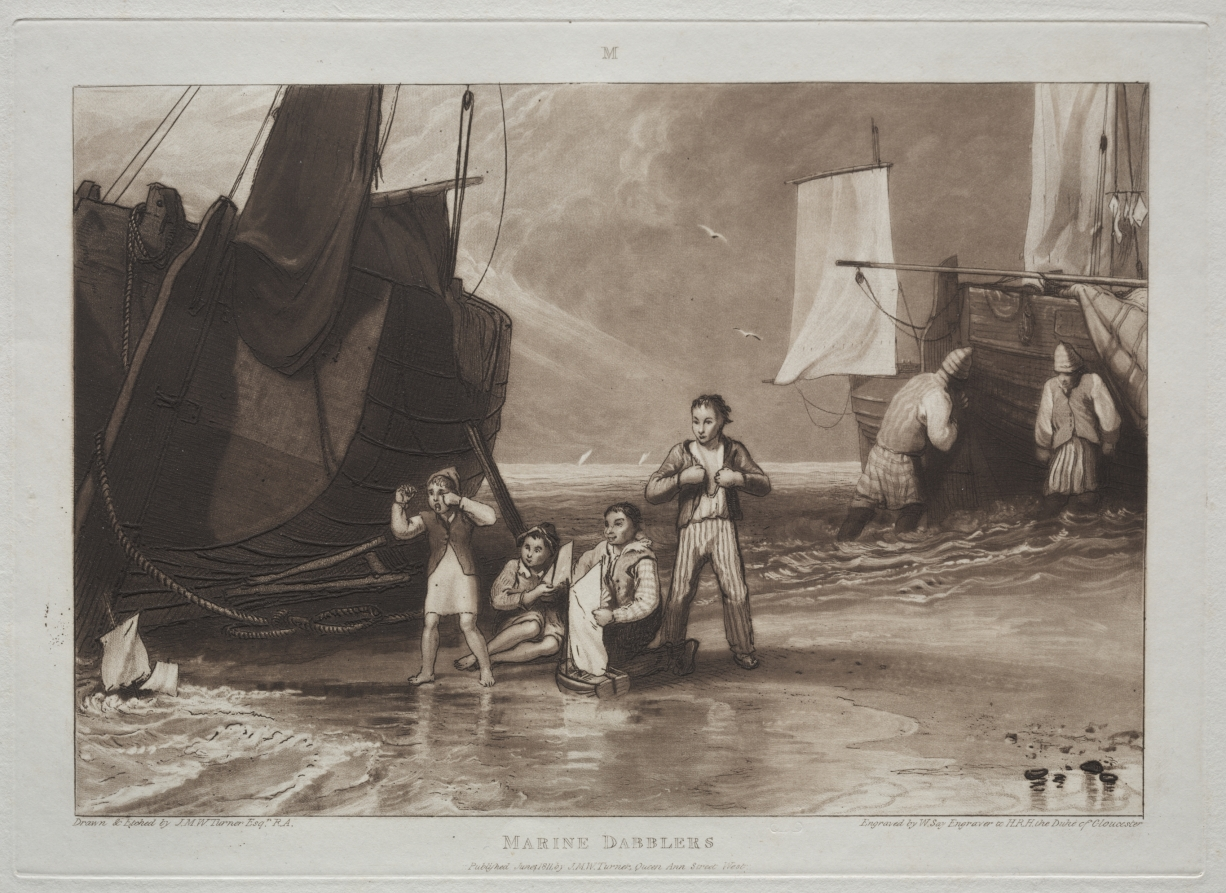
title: Liber Studiorum: Marine Dabblers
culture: England, 19th century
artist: Joseph Mallord William Turner (British, 1775–1851)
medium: etching and mezzotint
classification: Print